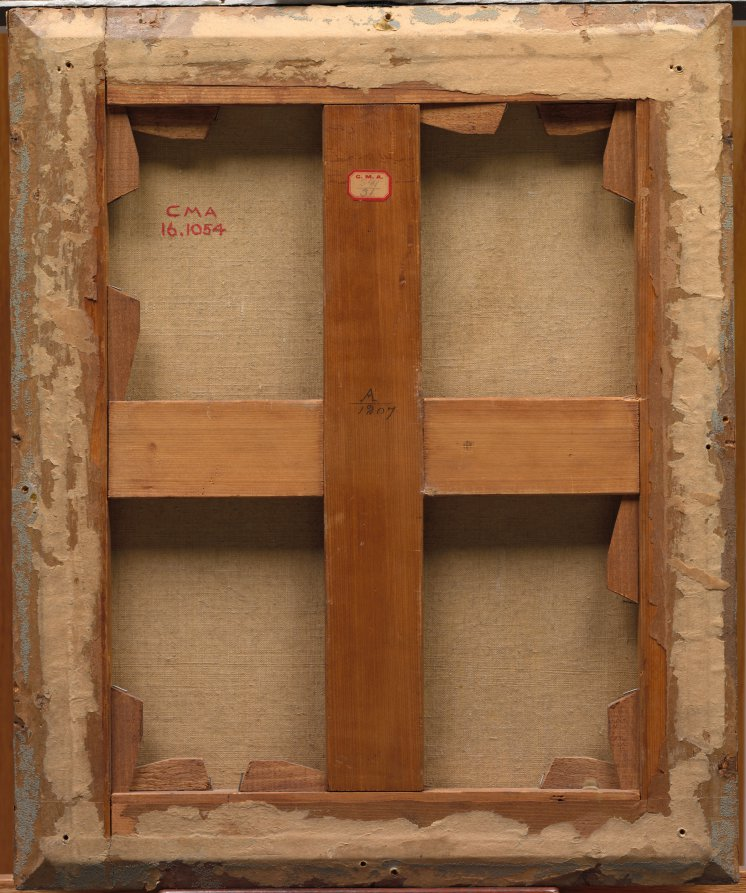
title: Figures in the Woods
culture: France, 19th century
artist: Adolphe Monticelli (French, 1824–1886)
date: c. 1857–1862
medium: oil on fabric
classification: Painting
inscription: Signed lower left: Monticelli